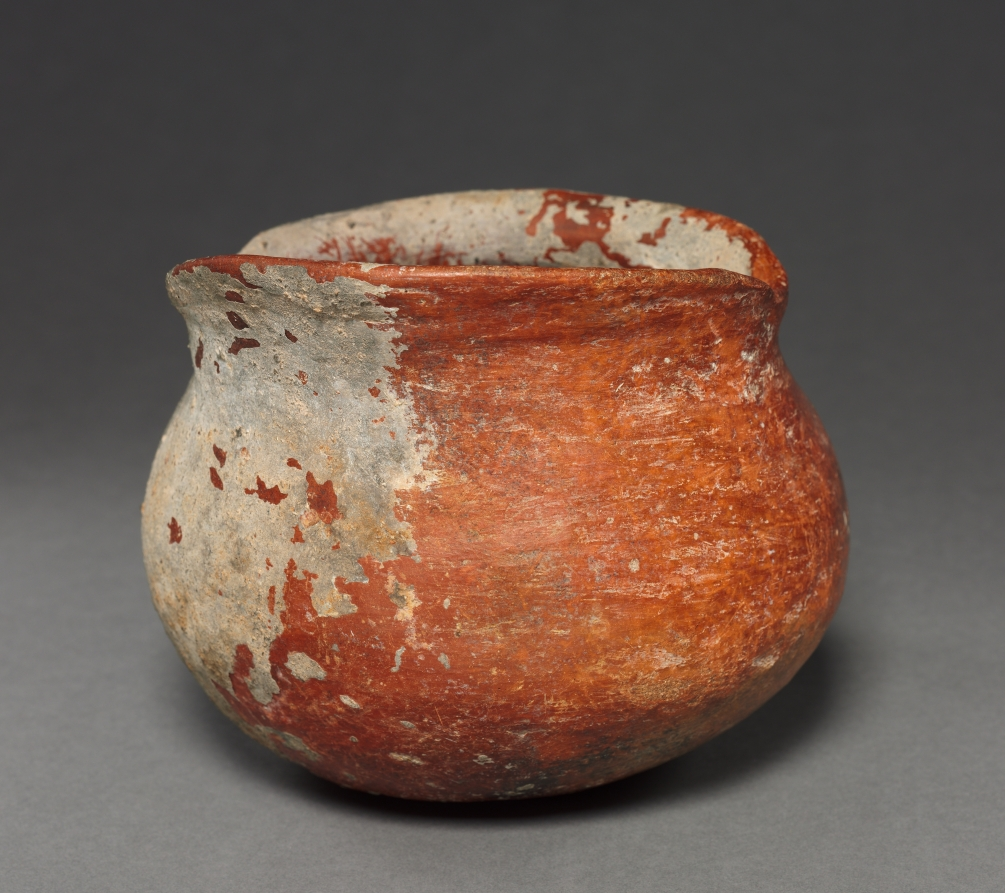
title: Head Effigy Bowl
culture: Mexico, Region of Tilantongo, District of Tlaxiaco, Nayarit style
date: 100 BCE–300 CE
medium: pottery with burnished red slip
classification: Ceramic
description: After about 200 BC, West Mexican chieftains gained in authority, their new status reflected in shaft tombs that shelter not only their remains but also lavish offerings, including sculptural ceramics. Many of the ceramics may refer to the crucial activities of a chief’s life, such as marriage, feasting, and war. The meaning of this unusual bowl—a head whose gaping mouth serves as the aperture—is unknown.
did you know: Diego Rivera and Rufino Tamayo were avid collectors of ancient Nayarit art.